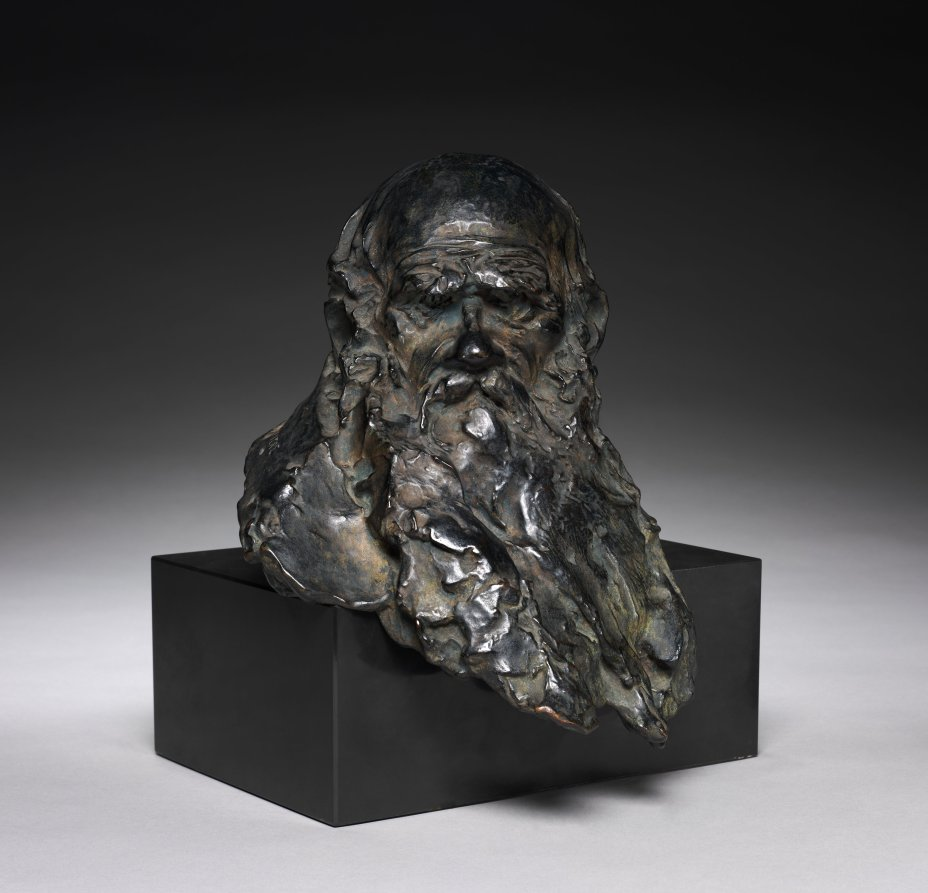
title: Bust of Tolstoy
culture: France, late 19th-early 20th century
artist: Théodore Rivière (French, 1857–1912)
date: d. 1985 – 1905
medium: bronze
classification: Sculpture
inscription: Signed on back of shoulder to left: "Theodore Riviere"